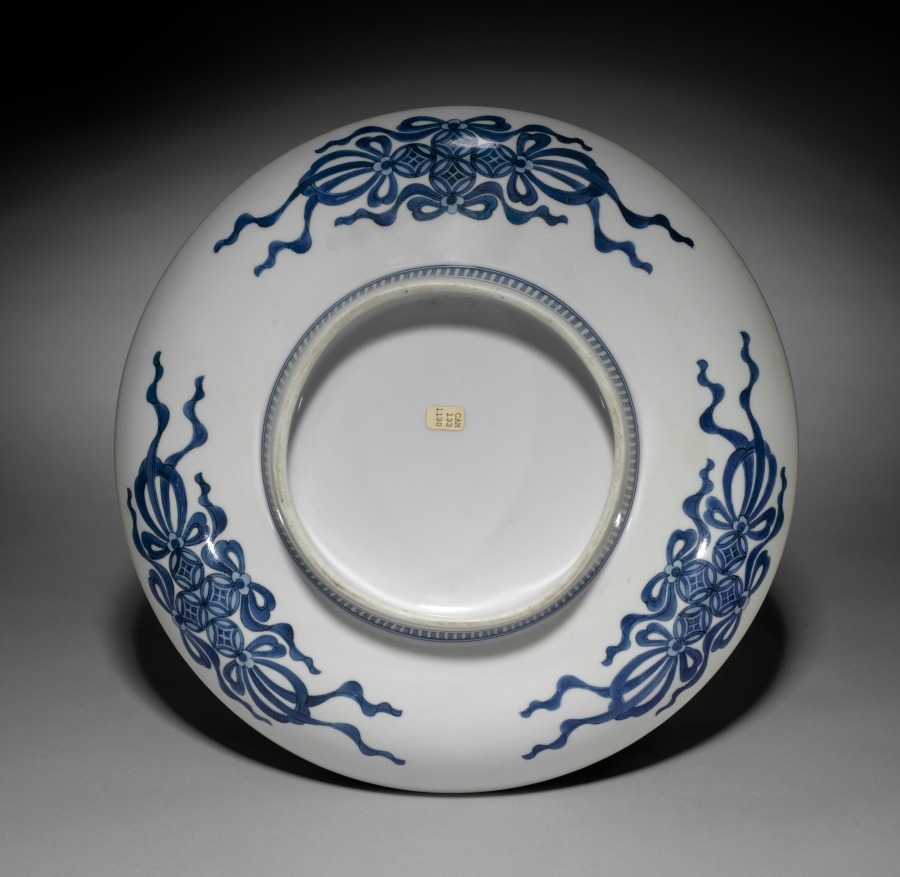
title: Plate with Willow Tree and Cloud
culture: Japan, Edo period (1615–1868)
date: 1800s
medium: Porcelain with underglaze blue (Hizen ware, Nabeshima style)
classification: Ceramic